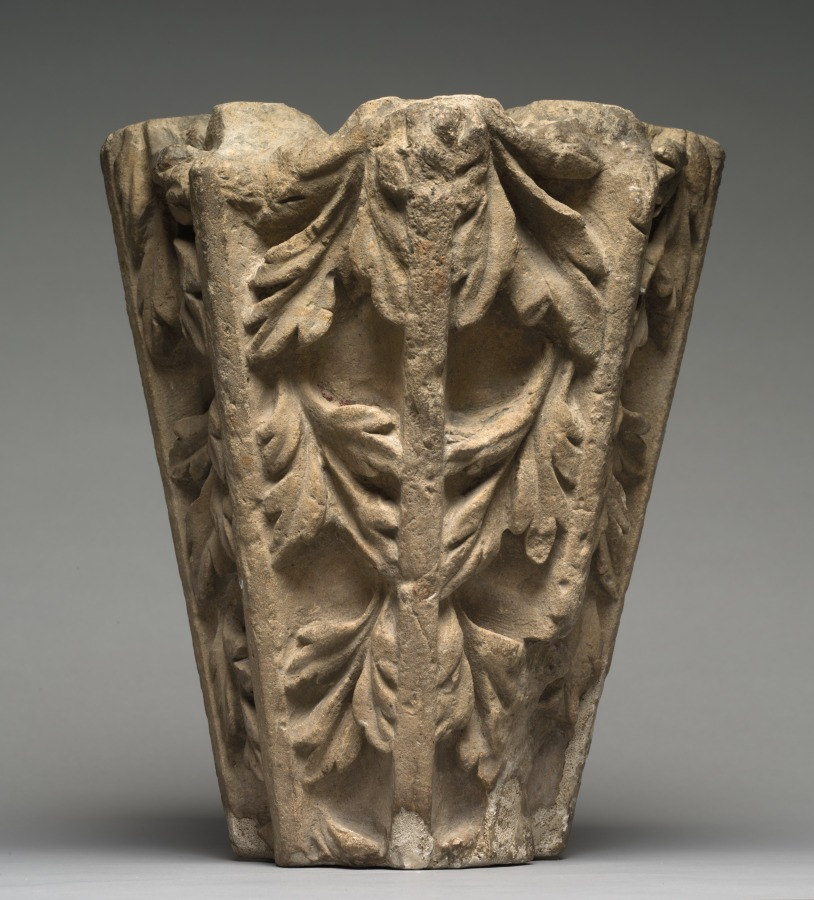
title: Fragment of Gothic Stone Crocket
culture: France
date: 1200s–1300s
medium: stone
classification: Sculpture